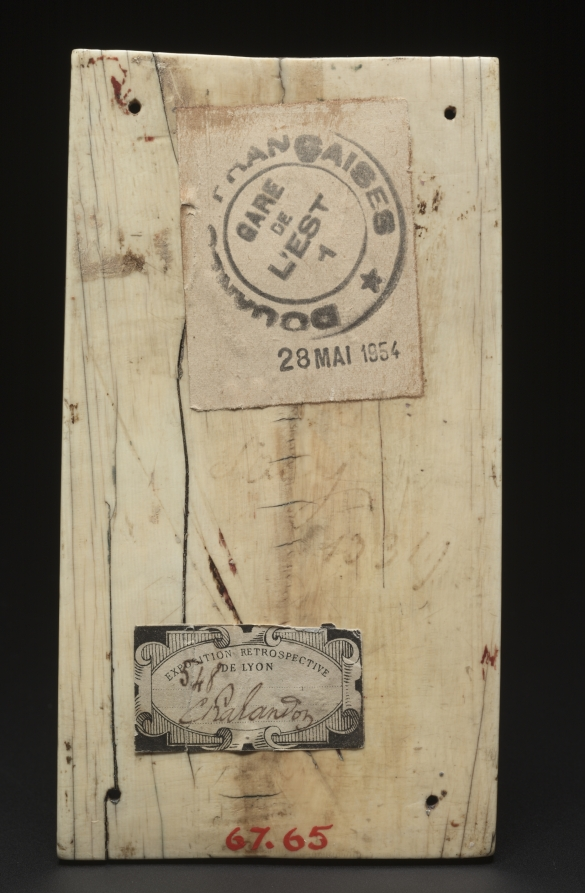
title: Christ's Mission to the Apostles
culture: Ottonian, Italy, Milan, Gothic period, 10th century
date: c. 970–980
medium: ivory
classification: Ivory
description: This ivory plaque represents a full-length figure of Christ flanked by bust-length portraits of the twelve apostles, six in a vertical column on each side. With his large eyes fixed on the beholder and his mouth slightly open, Christ seems about to speak to the apostles, charging them with the mission of preaching the Gospel to the world. The plaque may originally have formed the central decoration of a precious Gospel book cover that may have looked much like the one Christ carries in this image.